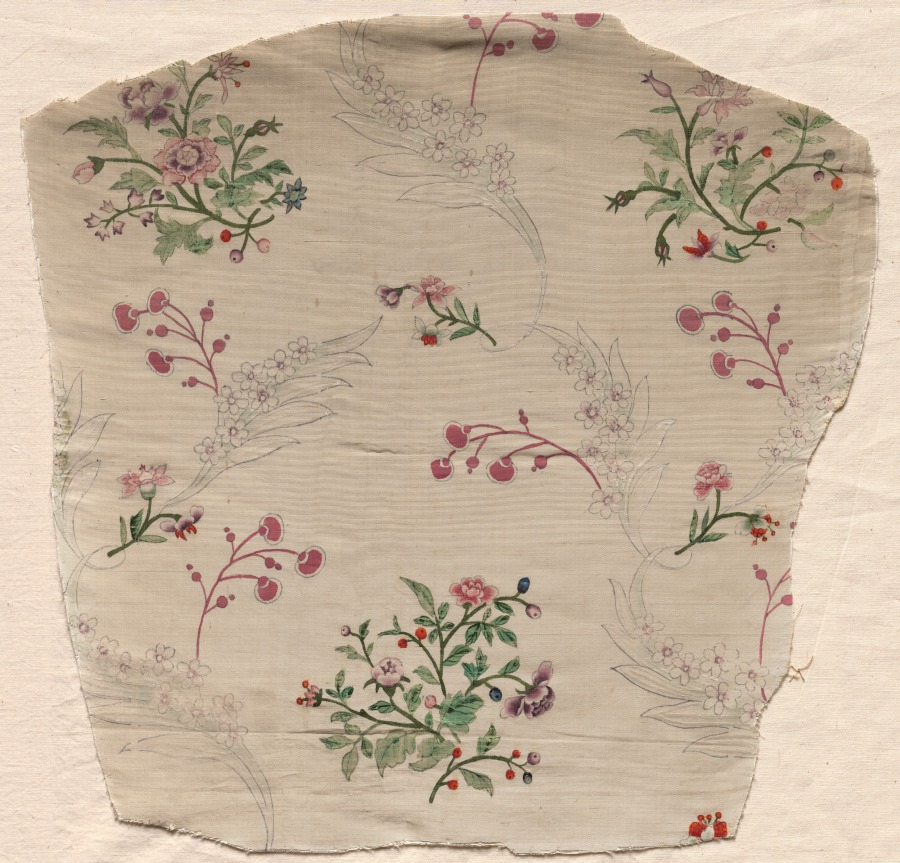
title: Fragment of Painted Taffeta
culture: France, 18th century, Louis XV Period (1723-1774)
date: 1723–1774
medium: hand painted silk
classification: Textile